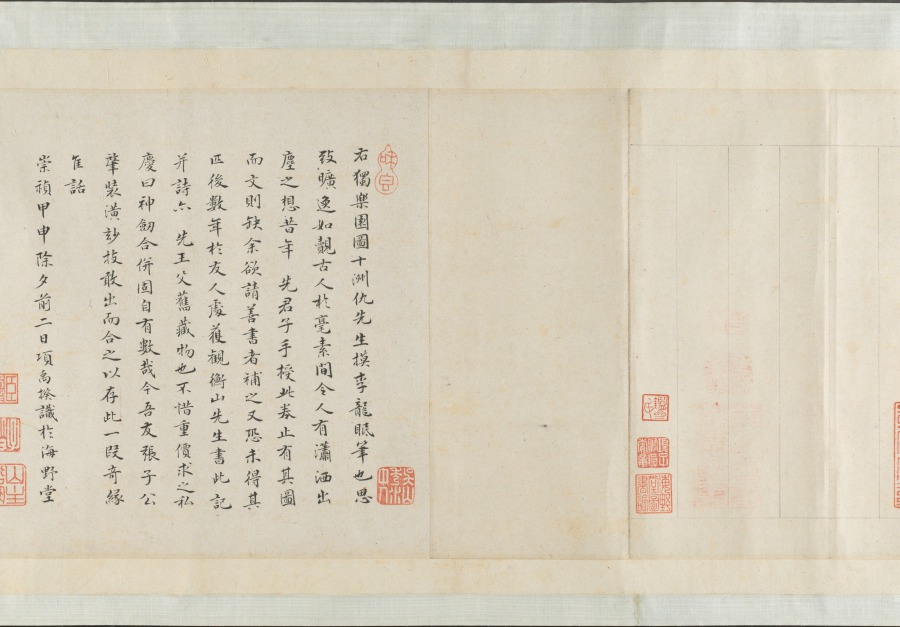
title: Garden for Solitary Enjoyment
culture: China, Ming dynasty (1368–1644)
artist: Qiu Ying (Chinese, 1494–1552)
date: 1515–52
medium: Handscroll; ink and light color on silk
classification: Painting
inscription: Accompanying text of an essay together with seven poems of Sima Guang (1019–1086) and one poem of Su Shi (1037–1101) written by Wen Zhengming (1470–1559) in 1558.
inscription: 2 colophons and 82 seals: 4 seals of Wen Zhengming 文徵明 (1470–1559); 59 seals of Xiang Yuanbian 項元汴 (1525–1590); 1 colophon, dated 1644, and 7 seals of Xiang Yukui 項禹揆 (c. late 1500s–1659); 1 colophon, dated 1880, and 2 seals of Weng Tonghe 翁同龢 (1830–1904); 2 seals of Ch'eng Chen-i (19th c.); 1 seal of Han Ch'ung (19th c.); 4 seals of Wan-go H. C. Weng 翁萬戈 (1918–2020); 3 seals unidentified.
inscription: Colophon by Xiang Yukui 項禹揆 (c. late 1500s–1659): The painting of The Garden for Self-enjoyment on the right by Shih-chou, Mr. Qiu [Qiu Ying] is in the style of Li Lung-mien. Its mood is peaceful, as if meeting the ancient gentlemen face to face among the brushes and silk; it lifts one above the sordid bustle of life. Formerly, my late father handed me this scroll which had only the painting without the written essay. I considered asking a good calligrapher to write the essay to add to it but was afraid that the quality of the writing would not match the painting. Several years later, I saw at a friend's house this essay and poems (of Ssu-ma Kuang] written by Hengshan [Wen Zhengming], once owned by my grandfather; so I spared no expense to obtain it. I rejoiced at this and said: "The divine swords are finally united. How things are pre-destined!" Now my friend Chang Kung-chao's technique for mounting [painting and calligraphy] is excellent. Therefore by daring to take them out and join them together, I can preserve this beautiful story of singular reunion. Xiang Yukui recorded at Hai-yeh-t'ang [hall] two days before New Year's Eve in the jiasheng year of the Chongzhen era [1644]. trans. LYSL/HK/WKH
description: Garden of Solitary Enjoyment refers to a site built in 1073 by the statesman Sima Guang (1019–1086) after he had retired to Luoyang, Henan province. Every spring, visitors would flock to his garden. Each of its seven structures references a historic figure. Sima wrote: I channel streams [like Du Mu], to water flowers [like Bai Juyi], or trim bamboo [like Wang Huizhi]. . . . I know of no joy between heaven and earth that could take its place. Qiu Ying’s painting, created after an 11th-century version of the same theme, must have appealed to garden owners of the Ming dynasty, since it became the template for numerous Suzhou workshop copies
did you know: Sima Guang completed his monumental survey of Chinese history, Zizhi tongjian, in the garden depicted in this painting.